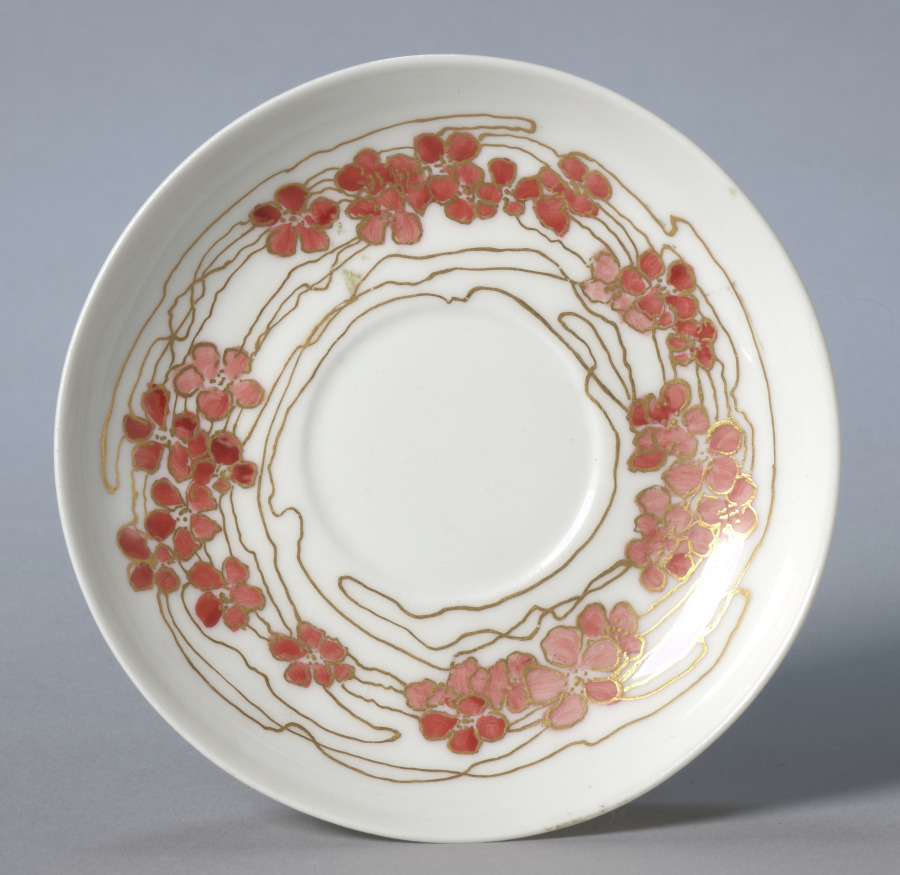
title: Saucer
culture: America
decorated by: M. Louise McLaughlin (American, 1847–1939)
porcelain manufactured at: Haviland & Co. (French)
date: 1890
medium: porcelain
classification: Ceramic